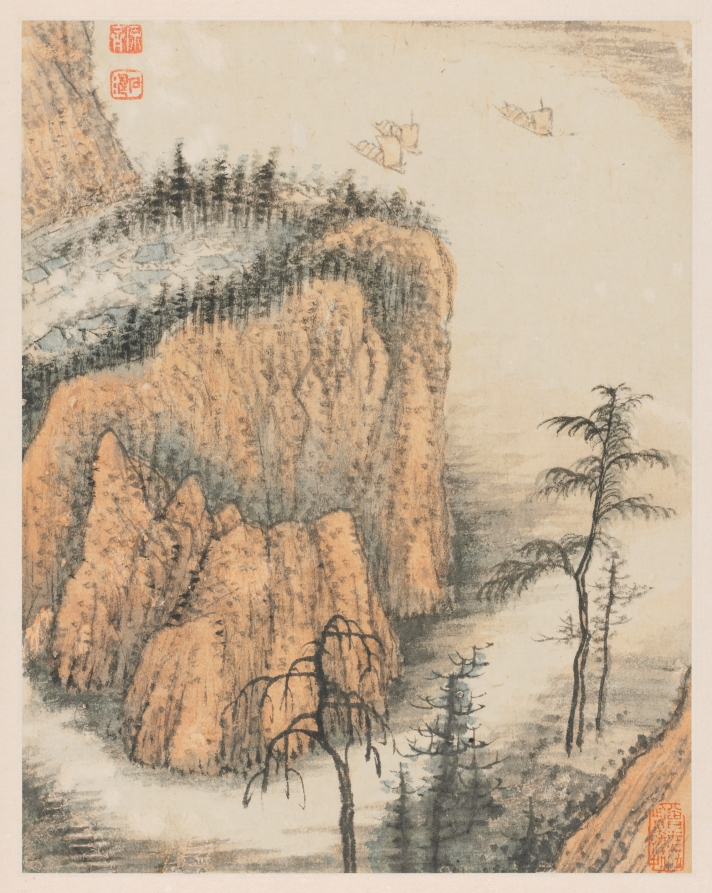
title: Reminiscences of Qinhuai River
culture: China, Qing dynasty (1644-1911)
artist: Shitao (Chinese, 1642–1707)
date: 1642–1707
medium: album leaf, ink and color on Song paper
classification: Painting